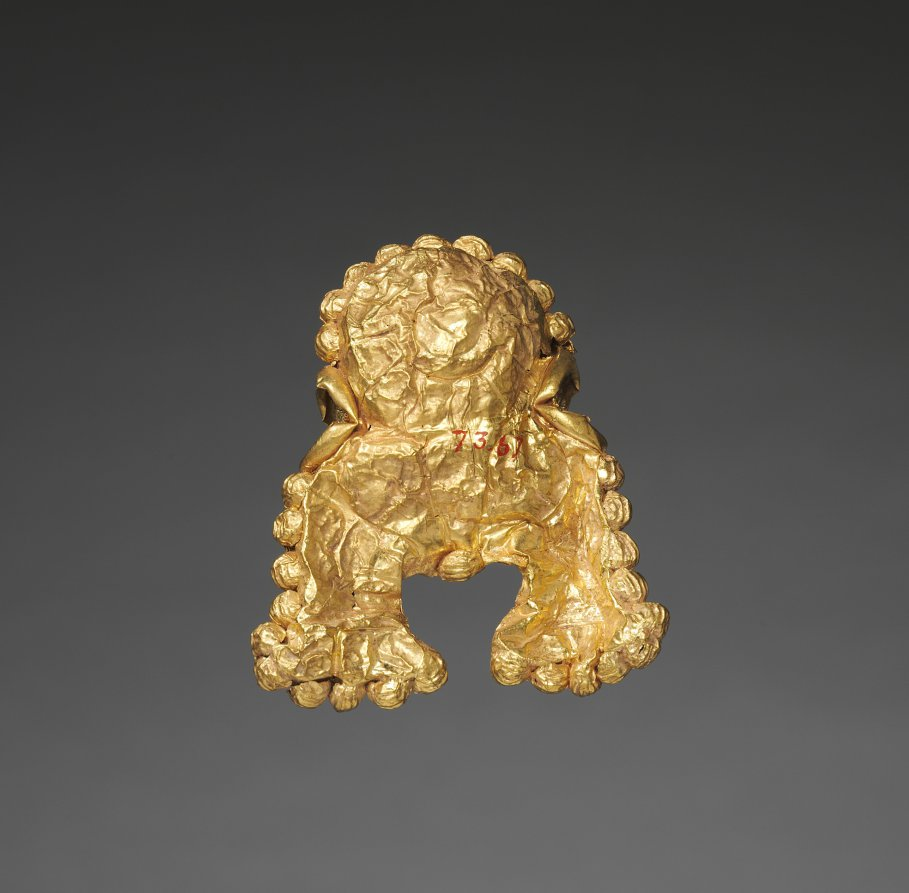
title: Triratna Pendant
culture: India, Uttar Pradesh or Madhya Pradesh, Shunga period (185–78 BCE)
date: 185–72 BCE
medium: gold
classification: Jewelry